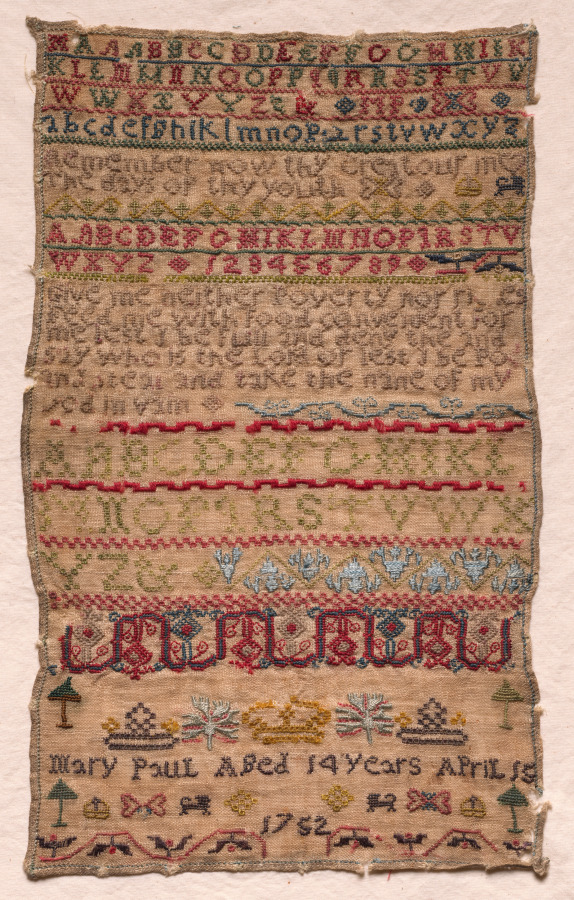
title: Sampler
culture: England, 18th century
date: 1752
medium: embroidery; silk and wool on linen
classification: Sampler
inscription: "AAABBCCDDEEFFGGHHIIK/ KLLMMNNOOPPQQRRSSTTVV/ WWXXYYZZ/ MP/abcdefghiklmnopqrstvwxyz/ Remember now thy creatour in/ The days of thy youth/ AABCDEFGHIKLMNOPQRSTV/ WXYZ 123456789/ [verse]/ ABCDEFGHIKL/ MNOPQRSTVWX/YZ/ Mary Paul Aged 14 Years April 15/ 1752."